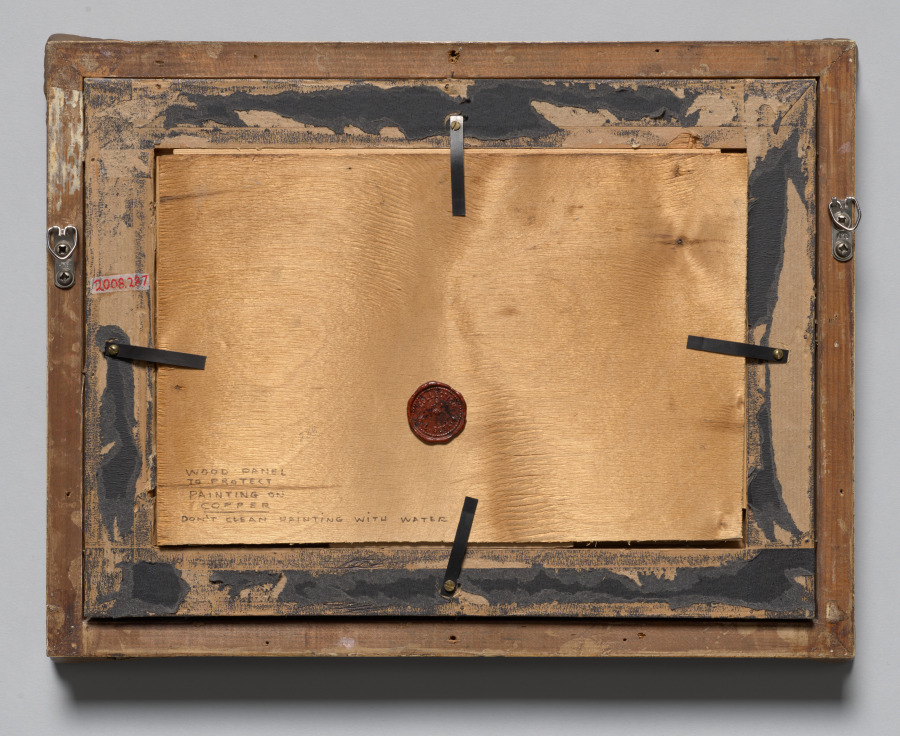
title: Winter Landscape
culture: Netherlands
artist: attributed to Jan Griffier (Dutch, 1648–1718)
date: c. 1680–1718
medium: oil on copper, mounted on wood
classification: Painting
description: A number of scholars have questioned the attribution because Griffier did not generally paint on copper and primarily painted hunting scenes. It may be based on a print, although the source has yet to be identified.